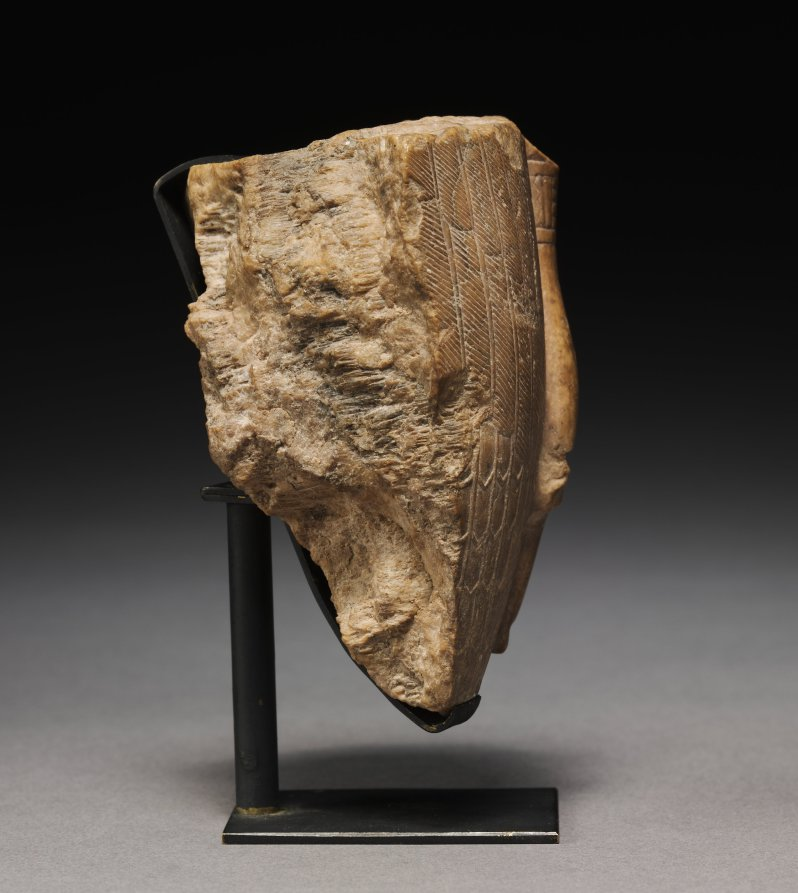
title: Fragment of a Feather-Garmented Figure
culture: Egypt, New Kingdom (1540–1069 BCE)–Third Intermediate (1069–715 BCE)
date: 1540–715 BCE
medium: limestone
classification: Sculpture